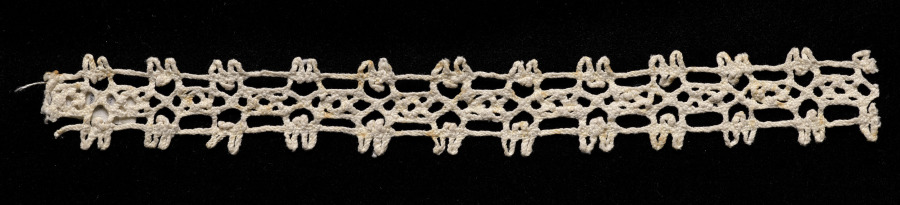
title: Lace Insertion (no selvage)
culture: Italy, Venice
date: 1540–60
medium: Bobbin lace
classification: Lace